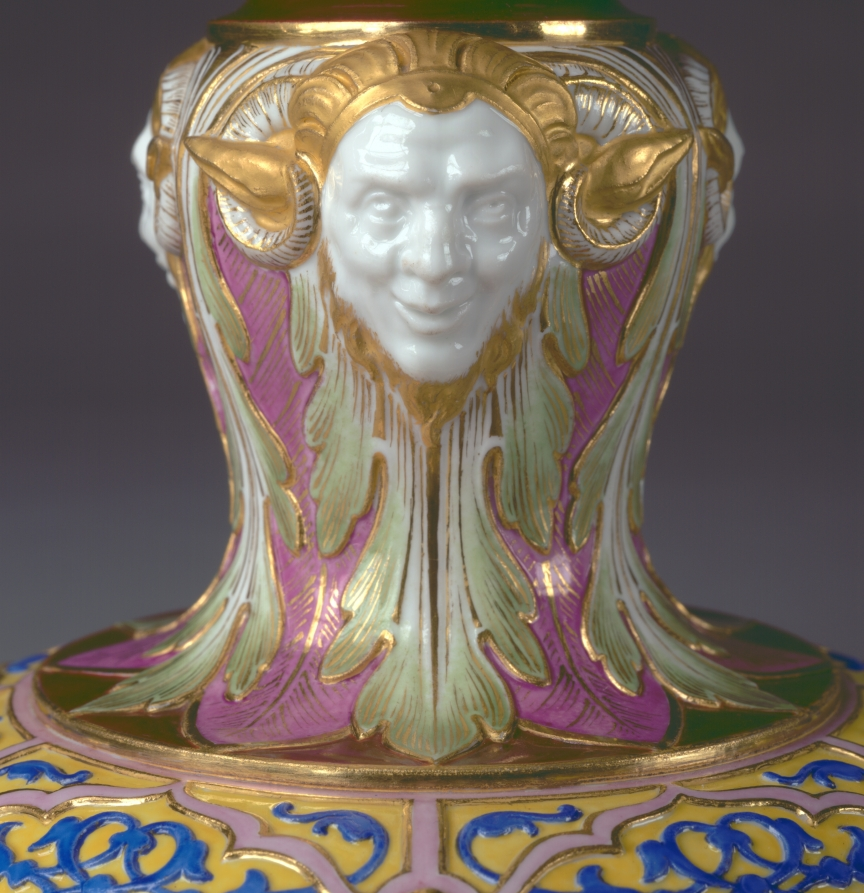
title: Standing Cup and Cover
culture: France, Sèvres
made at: Sèvres Porcelain Factory (French, est. 1756)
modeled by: Hyacinthe-Jean Regnier (French, 1803–1870)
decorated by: Francois-Hubert Barbin (French, 1786-)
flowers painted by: Jacques-Nicolas Sinsson (French)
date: 1844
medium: porcelain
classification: Ceramic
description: The official French porcelain factory at Sèvres has always been one of Europe's most important ceramic manufacturers, famous for its decorative pieces as well as more utilitarian wares. This vase in the Renaissance style, its design inspired by 16th-century French examples, is clearly in the tradition of elaborately conceived and decorated pieces intended for use by the French court or as presentation pieces by its monarchs. The latter was the fate of this Covered Cup, acquired in 1846 by Queen Marie-Amélie d'Orleans, the wife of Louis-Philippe, king during the July Monarchy (1830-48). Soon thereafter the vase was presented to a now unknown person. It is one of four pieces of this design made at the Sèvres factory, and the only one known today to have survived.